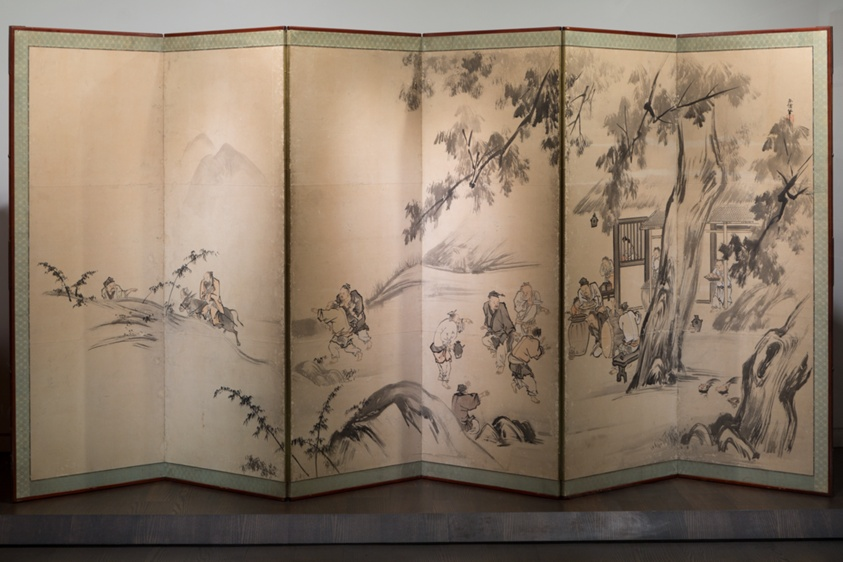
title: Monkey Trainers and Scenes of Chinese Life (耕作図屏風)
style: edo (japanese period), Japanism, East Asian, asian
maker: Kano Yasunobu (狩野安信); Japanese, 1613–1685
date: Edo period (1615–1868), 17th century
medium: Ink and light colors on paper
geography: Japan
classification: screen; painting; asian art